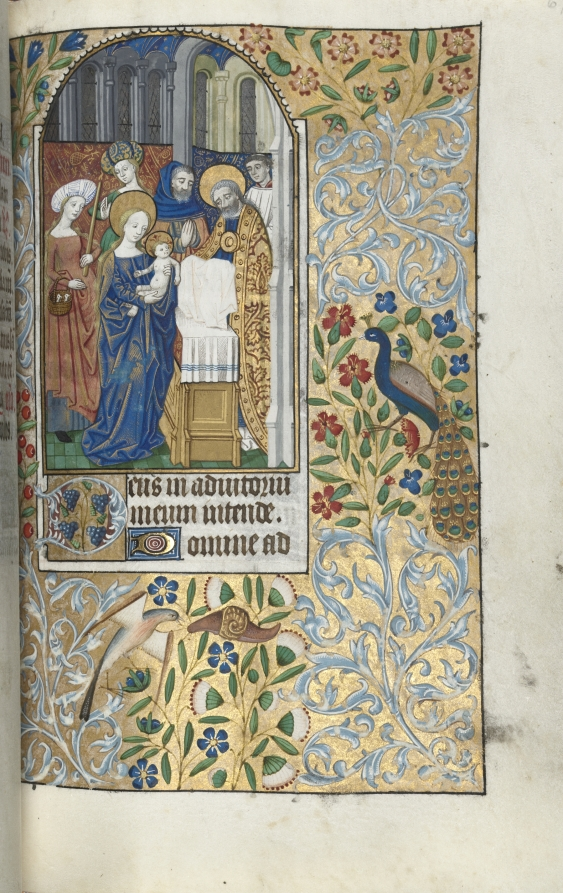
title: Book of Hours (Use of Rouen): fol. 67r, Opening of None, Presentation of the Christ Child in the Temple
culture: France, Rouen, 15th century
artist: Master of the Geneva Latini (French, active Rouen, 1460–80)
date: c. 1470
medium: ink, tempera, and gold on vellum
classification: Bound Volume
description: In the late 1400s and early 1500s Rouen was an established and important center of book production. The city’s cathedral had a wealthy chapter that spent large sums of money to commission books and to maintain its extensive library. The stationers and booksellers would have likely been concentrated in or near the cathedral precinct. This artist, named after a manuscript now in Geneva, was Rouen’s principal illuminator during the second half of the 1400s.